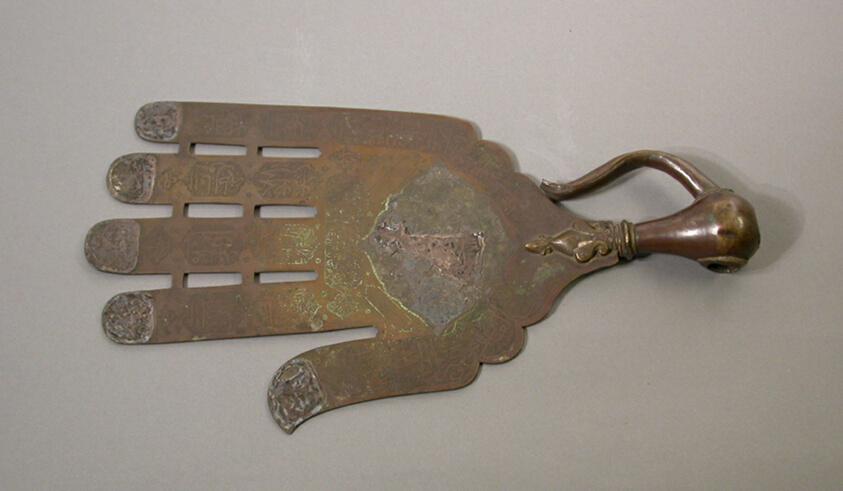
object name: Religious/Ritual Object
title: Khamsa Standard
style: Islamic (culture or style)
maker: Iran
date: Qajar dynasty (1789-1925), c. early 19th century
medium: Brass, with silver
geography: Iran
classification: brass; metalwork; asian art; ritual objects